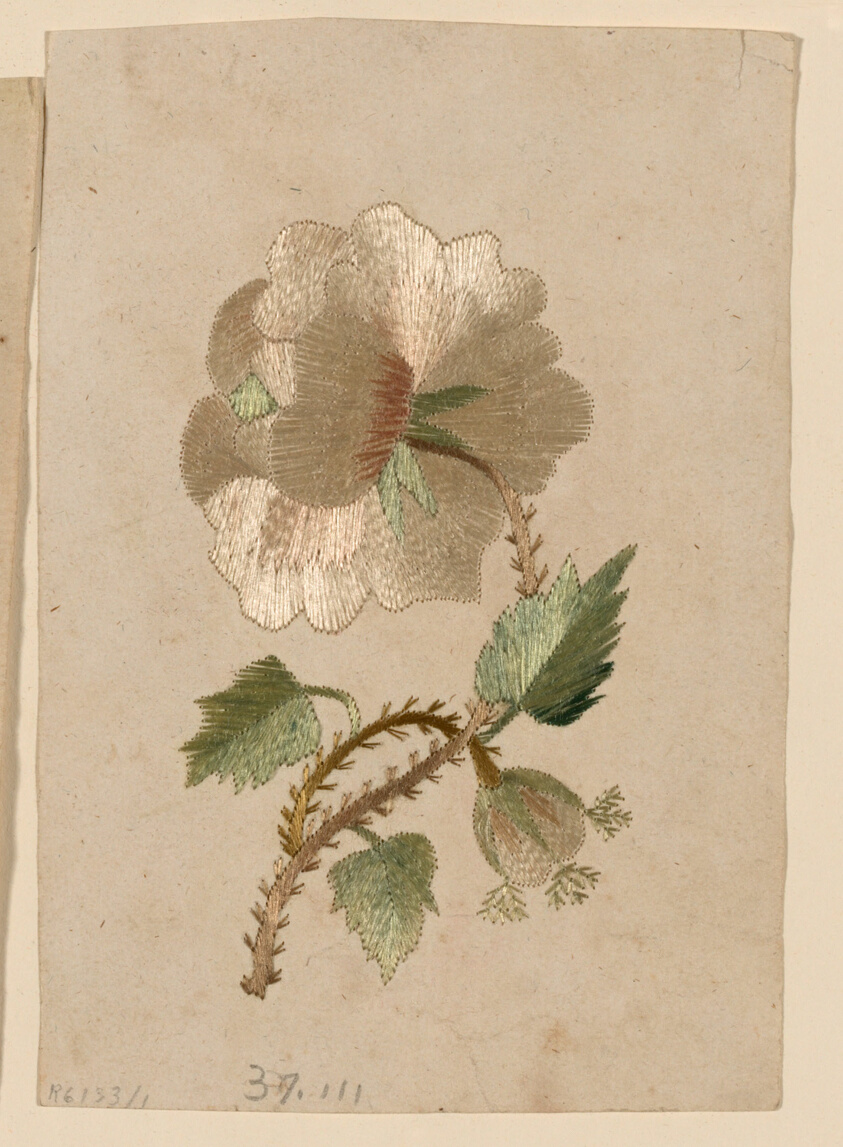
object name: Textile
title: Pattern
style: bukhara, central asian, asian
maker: Bukhara, Turkestan, Uzbekistan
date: 18th century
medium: Embroidered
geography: Uzbekistan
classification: textile; needlework (visual works)